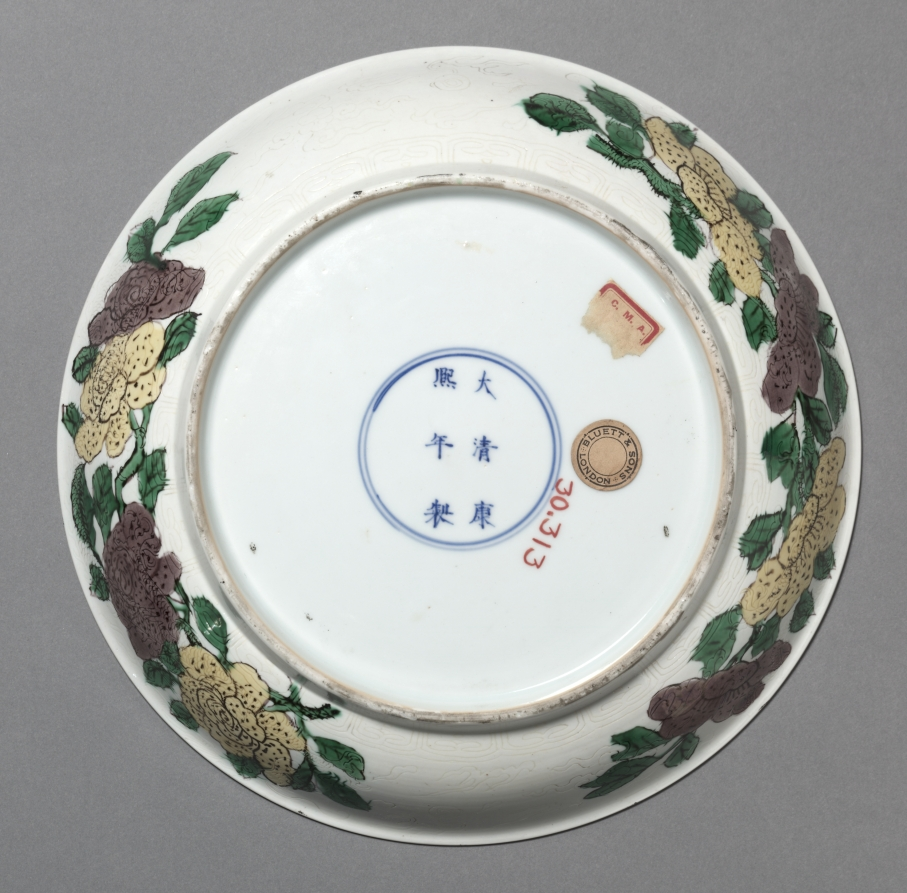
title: Dish with Dragons, Pomegranates, and Peaches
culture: China, Jiangxi province, Jingdezhen, Qing dynasty (1644-1911), Kangxi mark and period (1662-1722)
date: 1662–1722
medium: Porcelain with incised and enamel decoration, susancai ware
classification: Ceramic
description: Various techniques are applied to the decoration of susancai or "plain three-color" ware. The hidden dragons are incised, over which are painted decoration of fruit and flower sprays outlined with black pigment and colored with yellow, green, turquoise, and purplish brown enamels. The ground is filled with ivory enamel over unglazed clay.